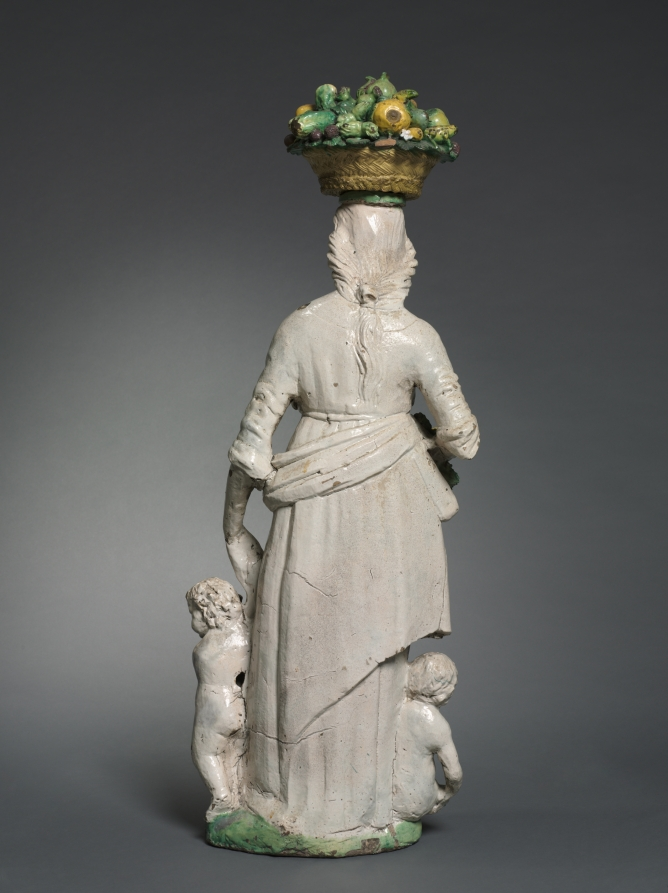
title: Dovizia (Plenty)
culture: Italy, Florence, 16th century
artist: Giovanni della Robbia (Italian, 1469–1529/30)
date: c. 1520–29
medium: glazed terracotta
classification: Sculpture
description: Many elite Florentine Renaissance homes had sculptures of idealized young women carrying nature’s bounty, such as this work. The motif stems from a statue by Donatello (about 1386–1466) that towered over Florence’s main public market. At home, however, the sculpture became a talisman for the family’s well-being. The city-state’s low birth rate was a serious political matter, and such a sculpture was believed to stimulate fertility while also promoting motherhood and bolstering financial success.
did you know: Inspired by an over life-sized, public sculpture by Donatello, Giovanni della Robbia reduced the figure for a domestic setting.